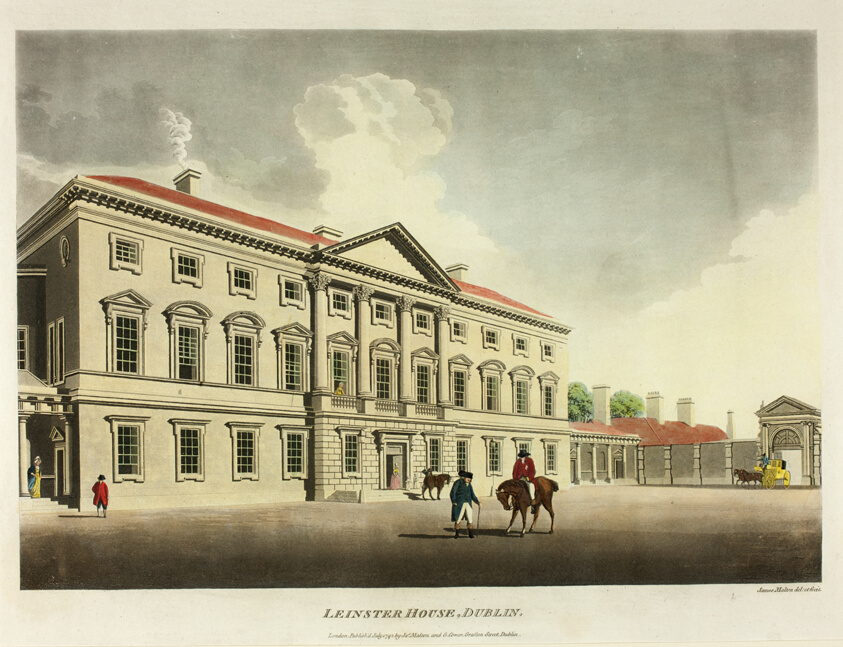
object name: Print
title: Leinster House, Dublin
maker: James Malton (English, 1761-1803)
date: published July 1792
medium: Hand-colored aquatint in black on ivory wove paper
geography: England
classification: aquatint; print; prints and drawing